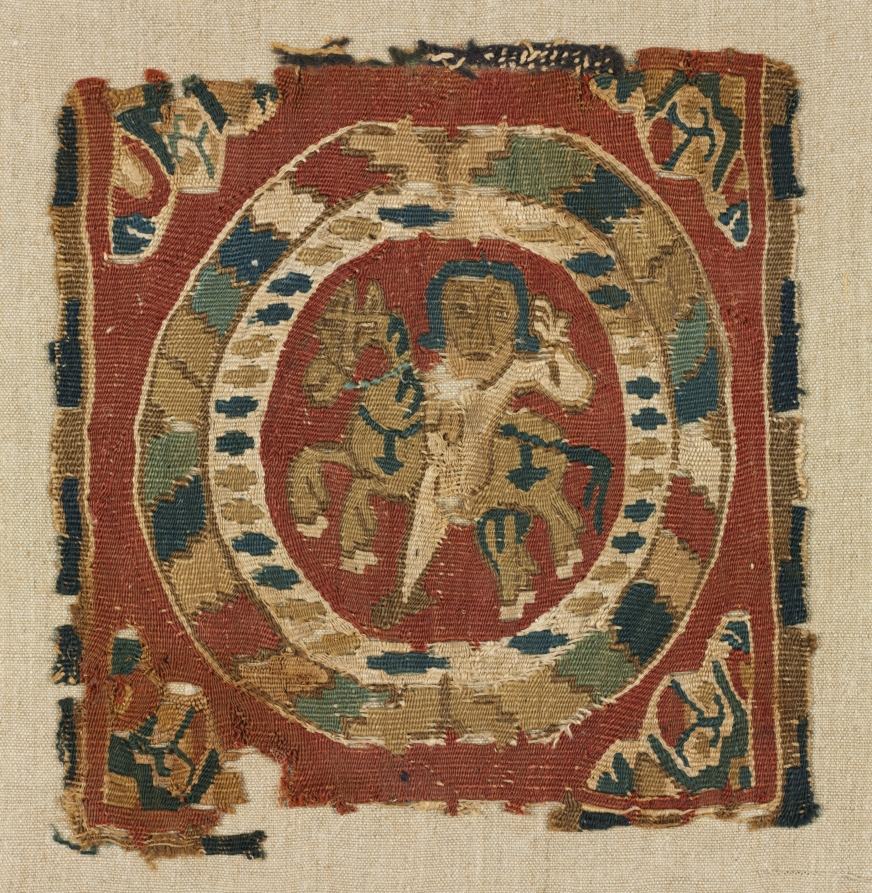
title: Segmentum from a Tunic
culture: Egypt, Abbasid period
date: 800 – 850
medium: tapestry weave; wool and linen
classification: Textile